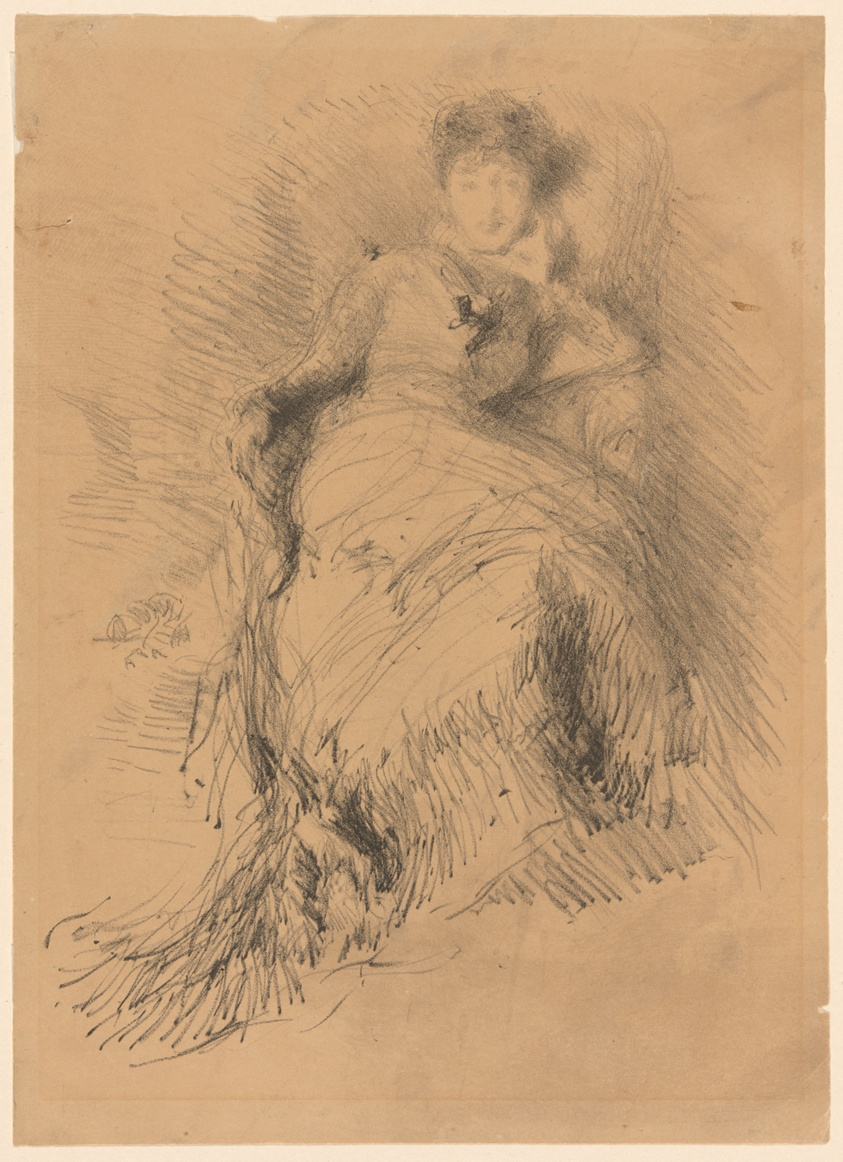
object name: Print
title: Study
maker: James McNeill Whistler (American, 1834-1903)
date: 1878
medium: Lithograph in black ink with scraping on tan wove paper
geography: United States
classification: lithograph; print; prints and drawing; paper